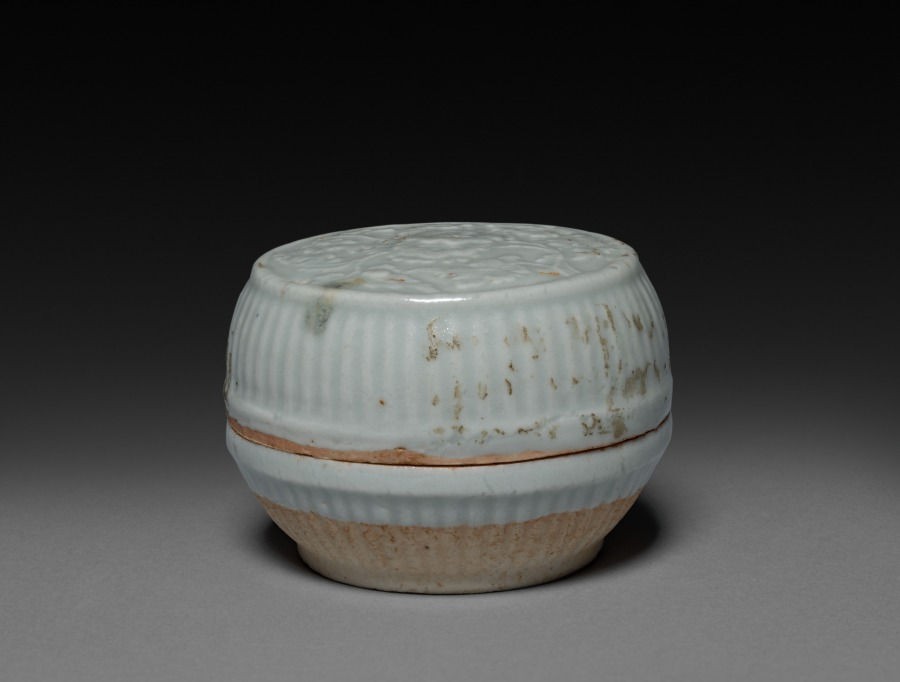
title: Circular Box: Qingbai Ware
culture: China, Southern Song Dynasty (1127-1279) - Yuan Dynasty (1271-1368)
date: 1200s-1300s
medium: glazed porcelain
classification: Ceramic